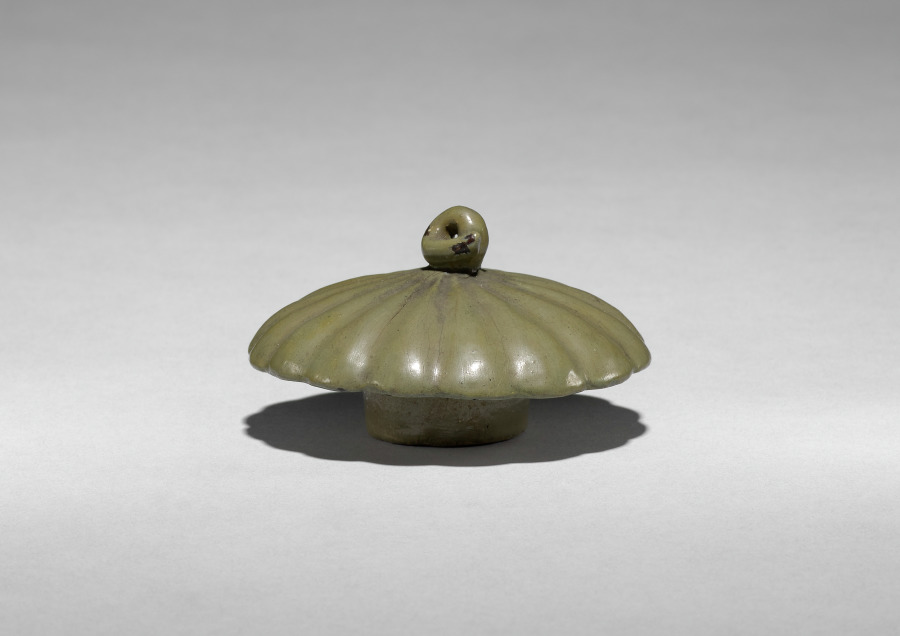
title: Wine Pot (lid)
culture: Korea, Goryeo dynasty (918–1392)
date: 918–1392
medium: pottery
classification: Ceramic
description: As early as the seventh century, the practice of drinking tea and wine became an important part of elite culture in Korea. Elites of the Goryeo period commissioned a variety of types of utensils and vessels including this elegant pot, not only to make their drinking experience more exciting, but also to show their appreciation of nature.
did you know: Originally the lid was not coupled with this pot.